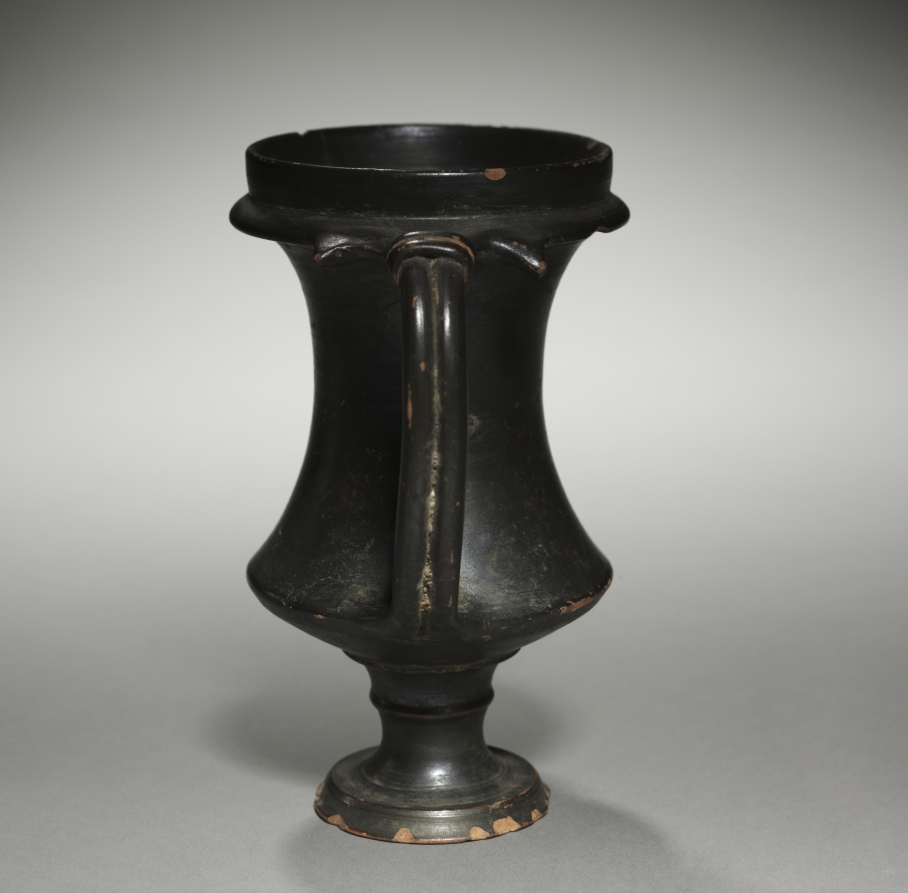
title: Black-Gloss Kantharos or Karchesion (Drinking Cup)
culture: Etruscan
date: 400–200 BCE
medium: ceramic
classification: Ceramic